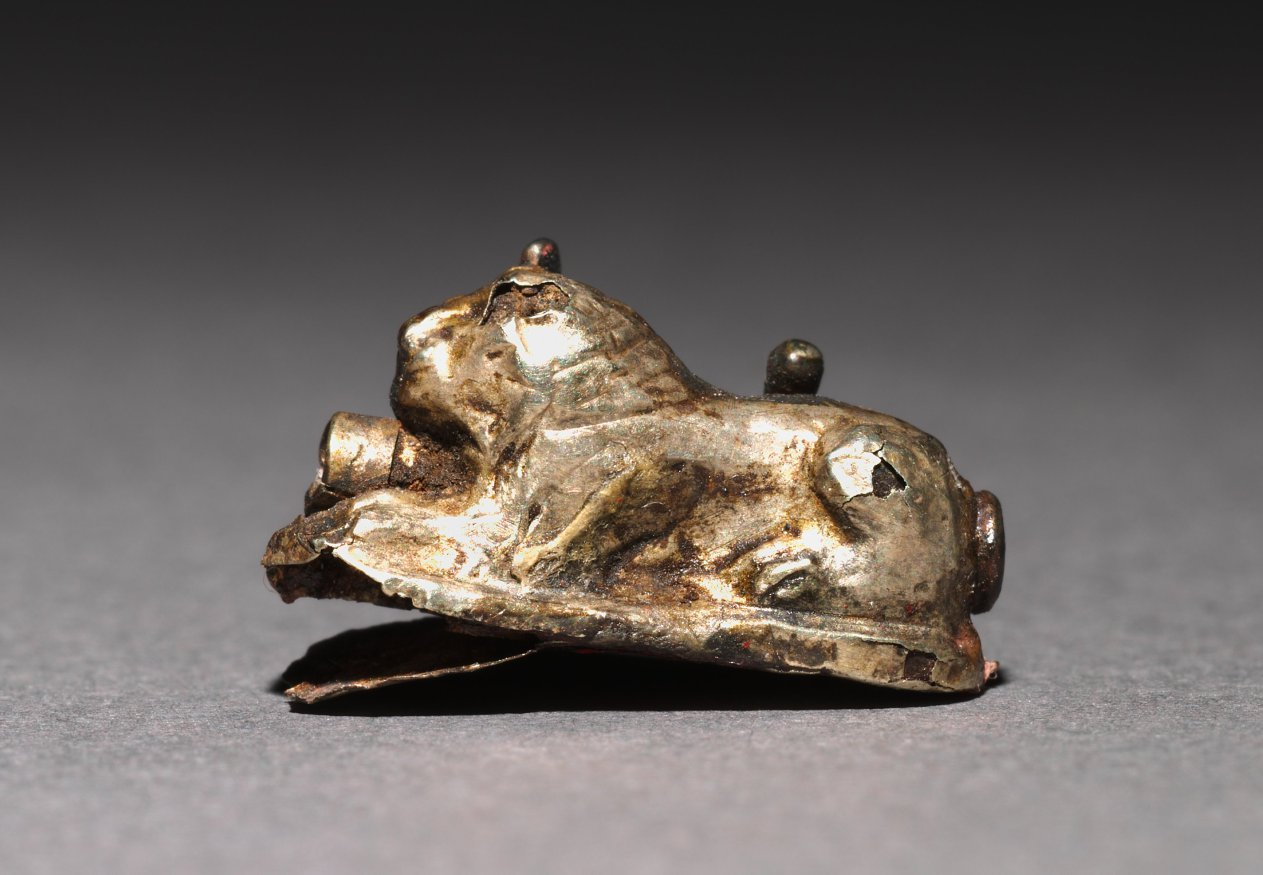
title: Recumbent Lion Bead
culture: Egypt, Middle Kingdom (2040–1648 BCE), Dynasty 12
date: 1980–1801 BCE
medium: electrum over a clay-bulked resin core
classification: Amulets